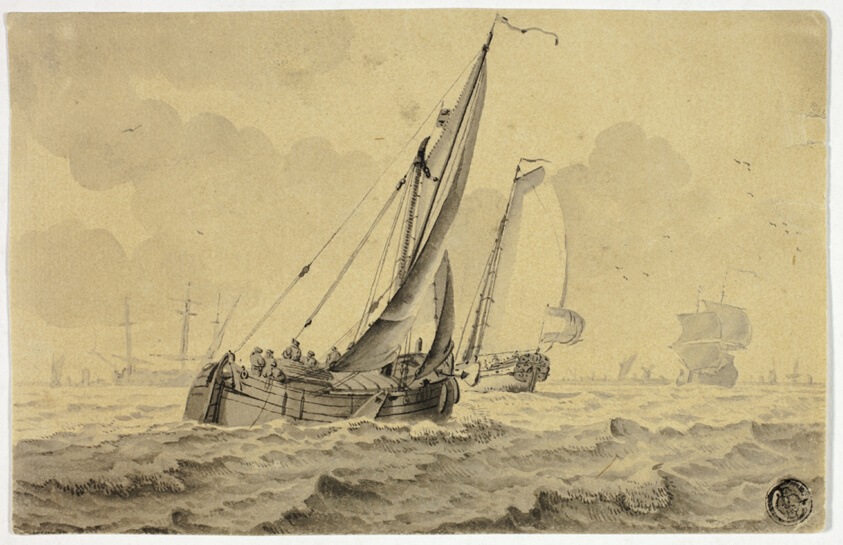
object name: Drawing and Watercolor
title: Boats in Full Sail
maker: Cornelis Ouboter van der Grient (Dutch, 1691-1783); or Wigerus Vitringa (Dutch, 1657-1721)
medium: Brush and gray wash, on buff laid paper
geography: Holland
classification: ink or chalk wash; drawings (visual works); prints and drawing